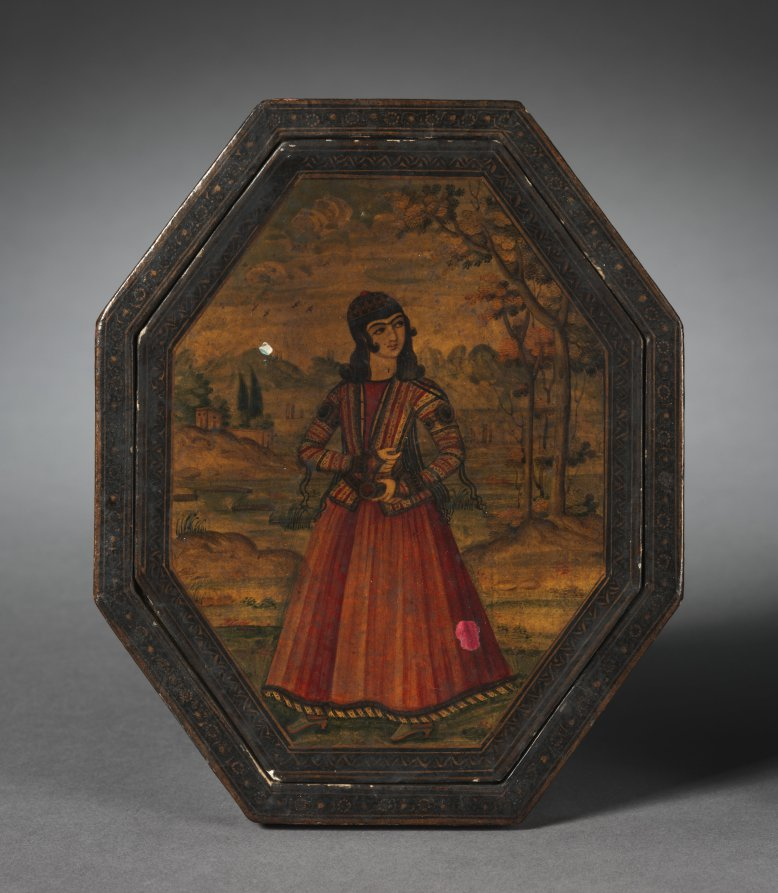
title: Octagonal Mirror Case with Lid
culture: Iran, probably Isfahan, Qajar period (1779–1925)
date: 1800s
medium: Varnished lacquer and opaque watercolor over papier-mâché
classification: Lacquer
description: This mirror case focuses on a single female figure shown on both the interior and exterior of the case. Although she wears a slightly different ensemble in the painting inside the lid, the woman has the same henna tattoo on her throat. On the exterior she is mounted on horseback and wears a jacket embroidered with gems and pearls over a pair of wide-legged trousers, typical for ladies of the Qajar court. Her bold continuous eyebrow, kohl-lined eyes, and henna-dyed fingernails accord with Qajar fashion.